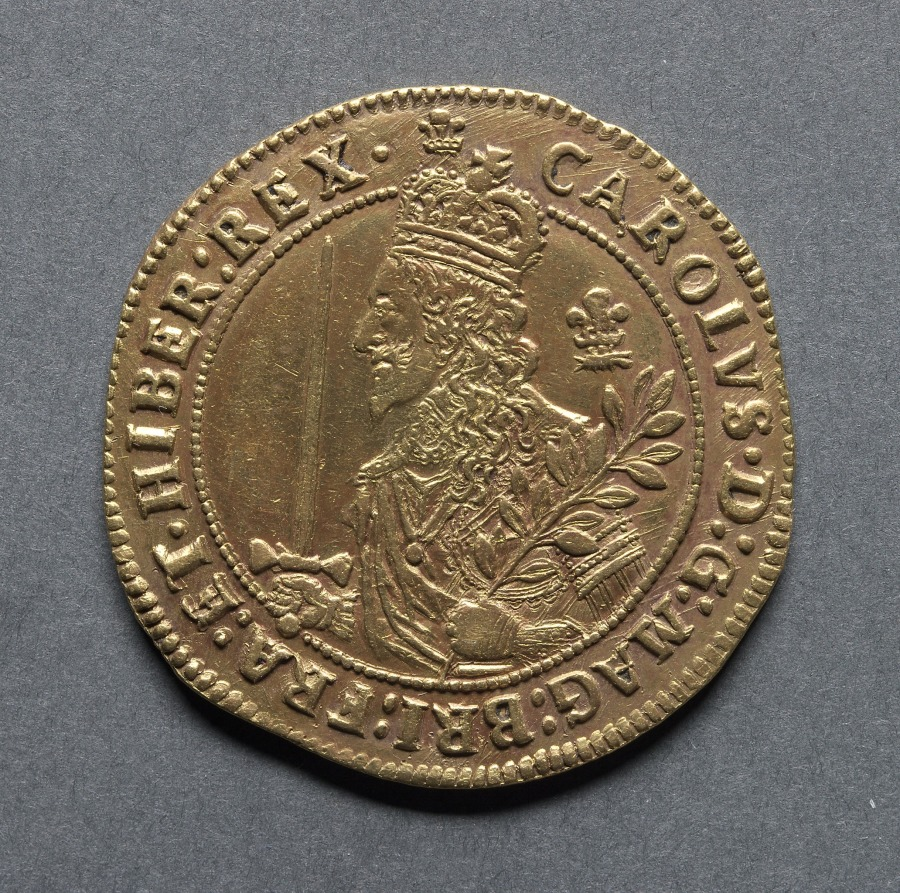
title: Triple Unite or Three Pound Piece: Charles I (obverse); Declaration on Scroll (reverse)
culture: England, Charles I, 1625-1649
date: 1644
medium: gold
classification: Coins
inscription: CAROLUS DG MAG BRIT FRAN ET HIBER REX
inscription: III RELIG PROT LEG ANG LIBER PAR 1644 OXON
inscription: EXURGAT DEUS DISSIPENTUR INIMICI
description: A more rare example of the Oxford Triple Unite, this piece is struck on a slightly smaller flan or planchet than 1969.195. Until his capture the King's headquarters remained at Oxford, and the OXON below the date denotes the place of striking. The king is shown at half length and is crowned. He holds a sword and olive branch with a plume behind him. On the reverse is Psalm 68, "Let God arise and His enemies be scattered."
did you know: The Triple Unite, valued at three pounds, was only produced during the English Civil War between 1642 and 1644.